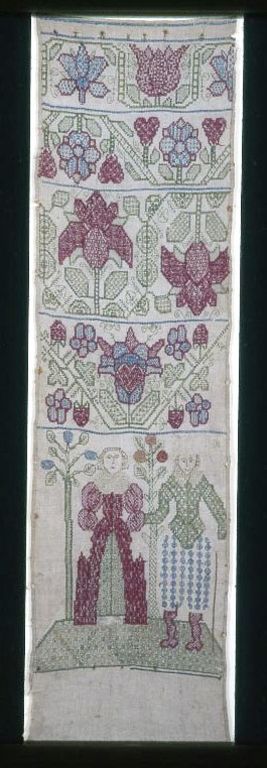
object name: Textile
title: Double-Sided Sampler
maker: England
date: 1675/1700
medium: Linen, plain weave; embroidered with silk in back, cross, double running, running, eyelet hole, four-sided, and two-sided Italian cross stitches; detached buttonhole stitches on reverse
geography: England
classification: textile; sampler; needlework (visual works)